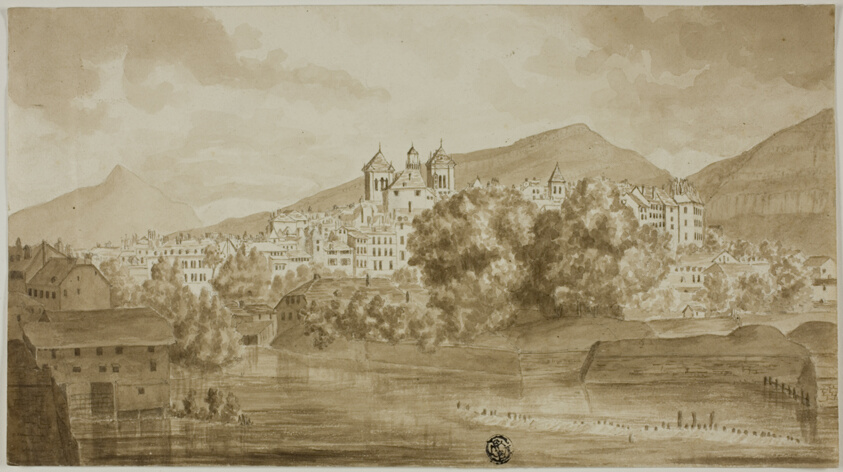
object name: Drawing and Watercolor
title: View of Town Overlooking River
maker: Unknown Artist; German, 19th century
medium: Brush and brown wash, with graphite, on cream wove paper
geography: Germany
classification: ink or chalk wash; drawings (visual works); prints and drawing